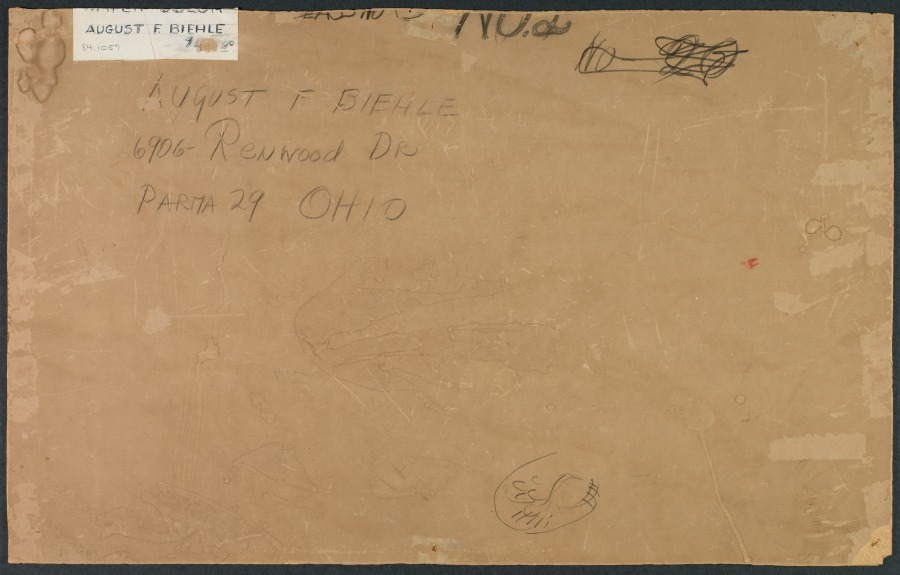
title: Sketch of Interior Design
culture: America, Ohio, Cleveland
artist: August Frederick Biehle, Sr. (American, 1854–1918)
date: before 1918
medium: watercolor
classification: Drawing